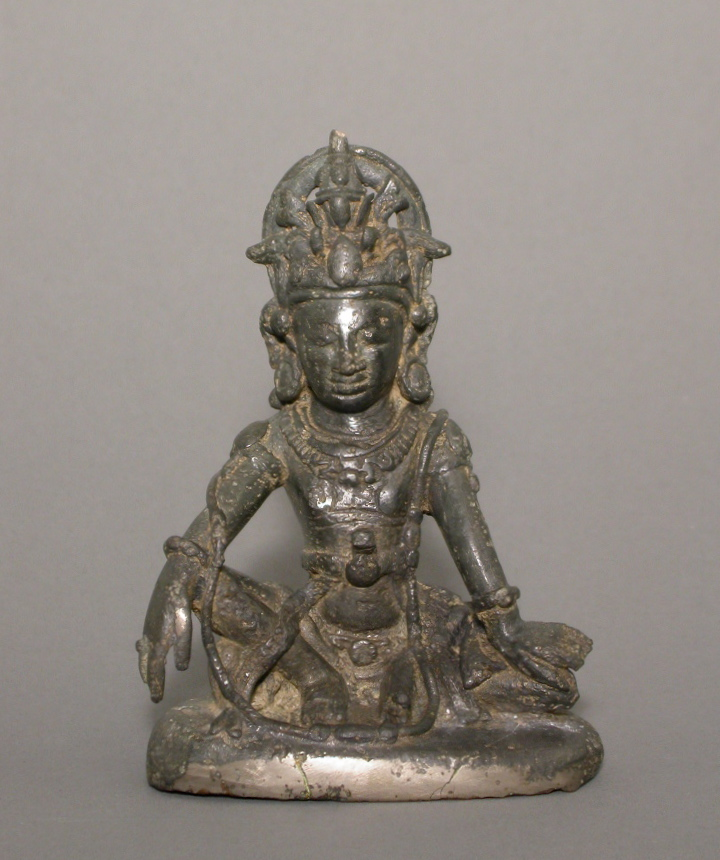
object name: Sculpture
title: Seated Bodhisattva Maitreya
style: Southeast Asian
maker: Burma (or Myanmar), possibly Sri Ksetra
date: Pyu period, 7th century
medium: Bronze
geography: Myanmar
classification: bronze; asian art; sculpture